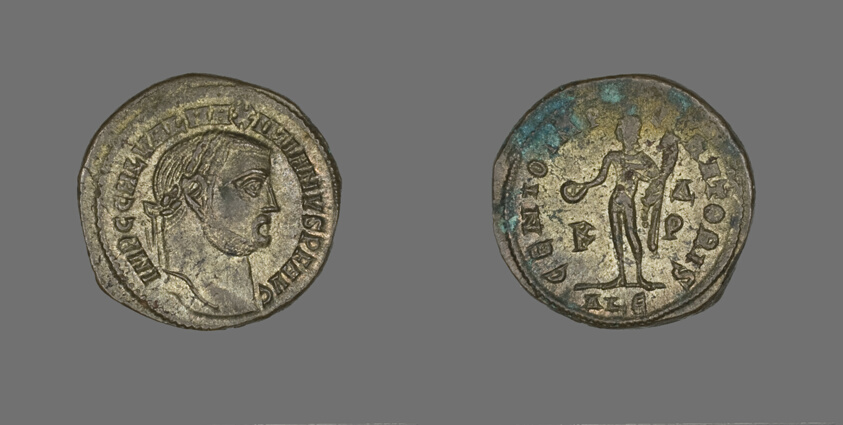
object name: Coin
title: As (Coin) Portraying Emperor Galerius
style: greco-roman, greco-roman (egyptian)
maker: Roman, minted in Alexandria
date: 305-311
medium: Bronze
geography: Ancient Mediterranean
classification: coin; ancient art